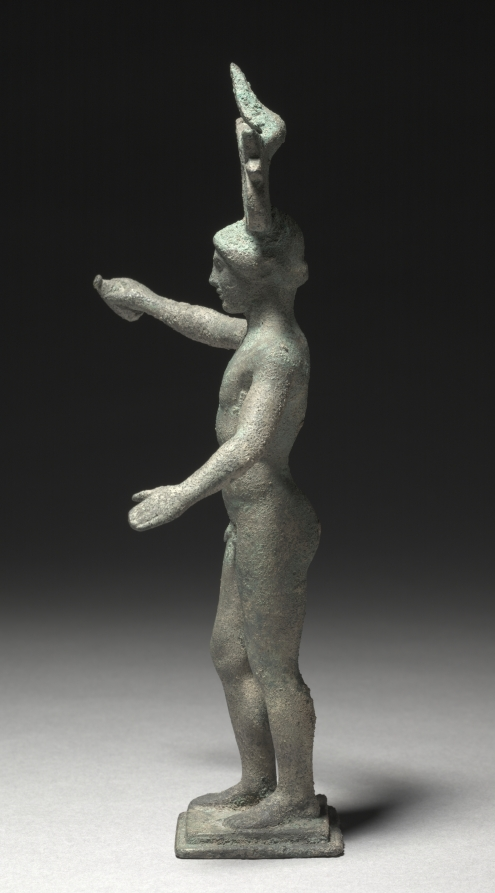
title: Mirror Support: Athlete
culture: South Italy, Locri (?), Greek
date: 460–450 BCE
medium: bronze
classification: Sculpture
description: A muscular nude youth strides forward on a square metal plate with his arms outstretched. The plate and the volute decoration that adorns his head suggest that this statuette was the support for a mirror. The youth is likely an athlete, as he holds an alabastron or oil vessel in his right hand. The oil may be an offering to the gods for victory, or to rub onto the skin to protect and beautify his body before an athletic contest. The mirror was made separately and would have been attached to the triangular tang above the athlete’s head.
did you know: Most Greek mirror stands depict female figures, but this one depicts a male.